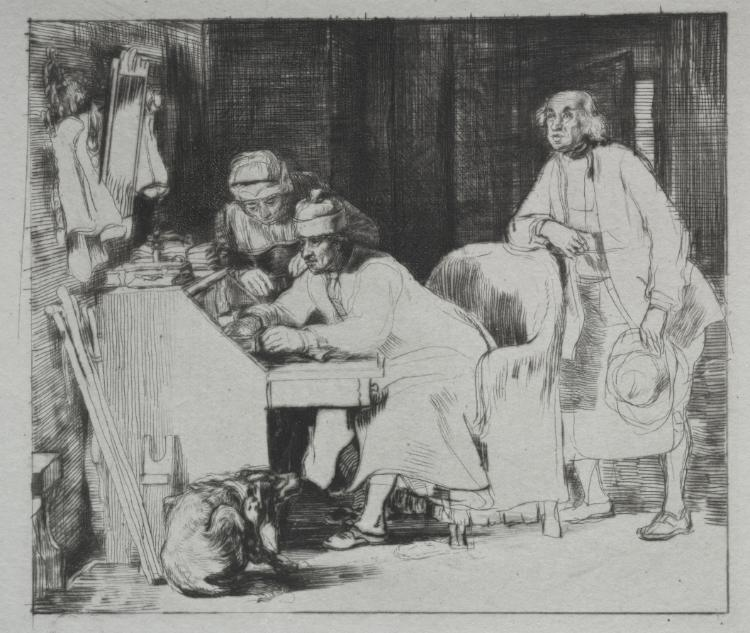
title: The Lost Receipt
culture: England, 19th century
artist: David Wilkie (British, 1785–1841)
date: 1824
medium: drypoint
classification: Print